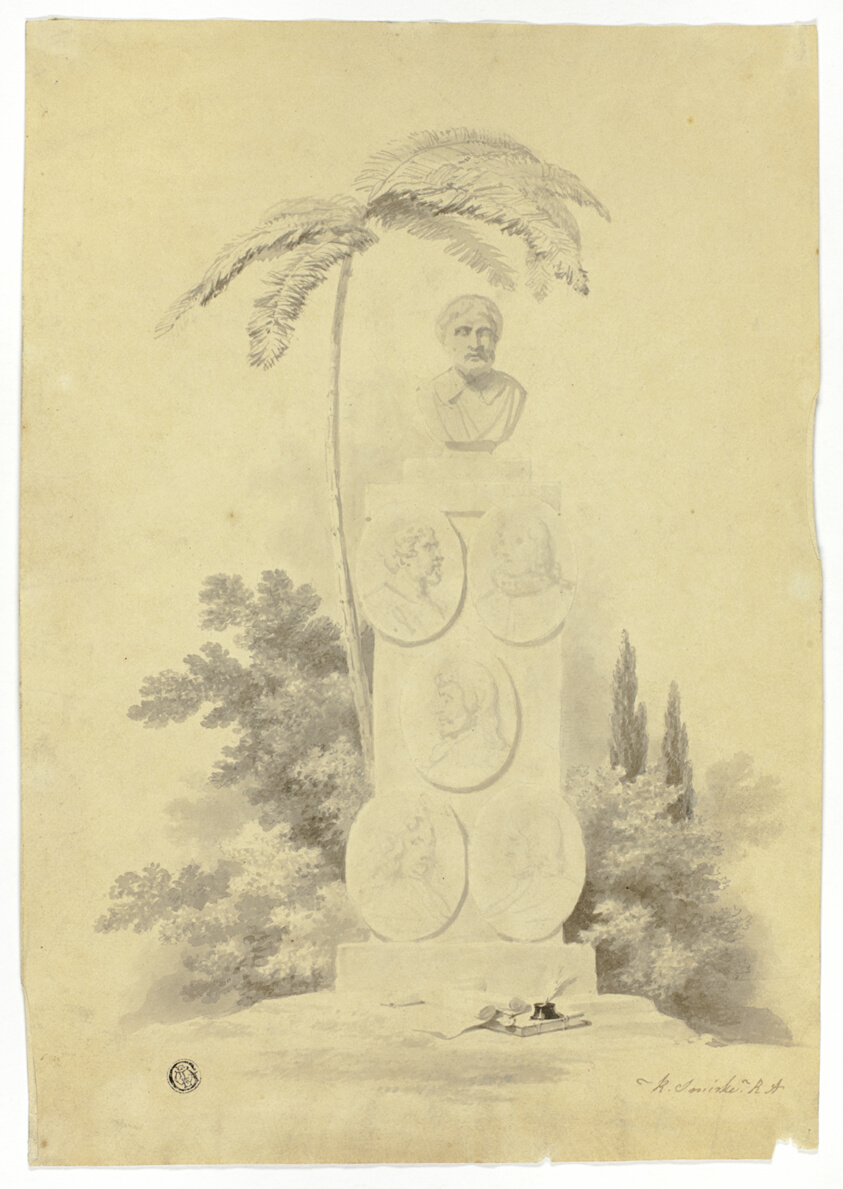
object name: Drawing and Watercolor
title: Monument with Palm Tree and Mementos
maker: Robert Smirke, the Elder; English, 1752-1845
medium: Brush and gray wash, over graphite, on cream wove paper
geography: England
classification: ink or chalk wash; paper; drawings (visual works); prints and drawing